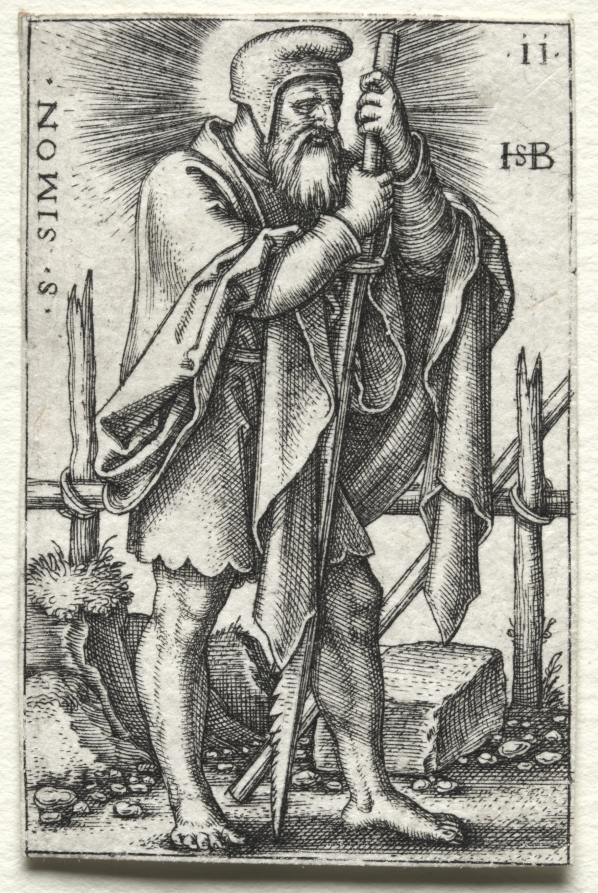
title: St. Simon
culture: Germany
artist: Hans Sebald Beham (German, 1500–1550)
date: 1545–1546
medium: engraving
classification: Print